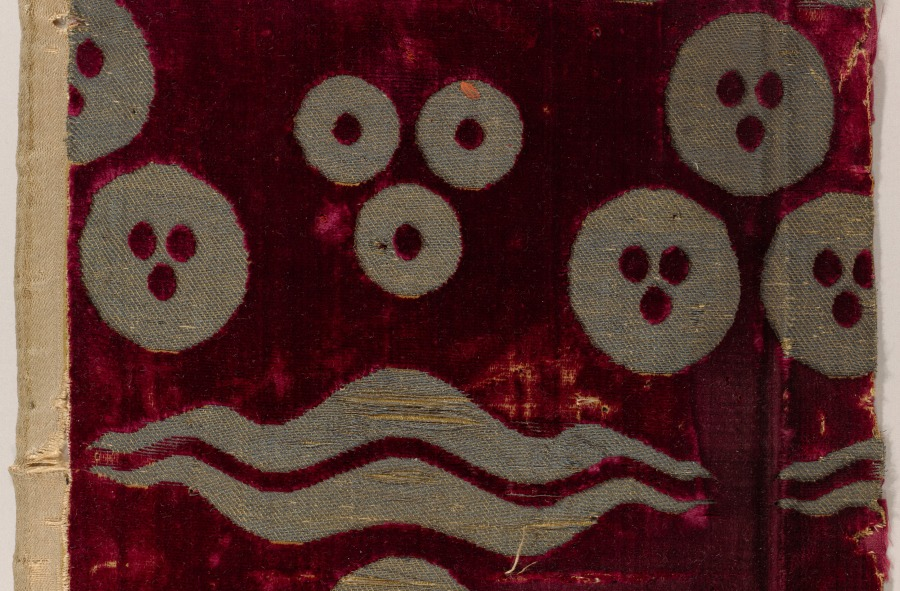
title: Brocaded velvet with chintamani design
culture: Turkey, Bursa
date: late 1400s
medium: velvet, brocaded: silk and silver-metal thread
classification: Velvet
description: This early Ottoman brocaded velvet was woven in an imperial workshop in the prosperous city of Bursa, the silk capital and major commercial center of the Ottoman Empire. It has exceptionally rich crimson silk pile, almost twice as dense as later monochrome velvets. The brocaded pattern of three balls and paired wavy bands is known as chintamani, derived from the Sanskrit word for a popular Buddhist motif, “the three jewels,” shown surrounded by flames or foliage in Buddhist art across Asia. Based on the high frequency of its use in art for the Islamic court of the Ottoman Turks, it appears to have been a favored motif and possibly even an unofficial imperial emblem.